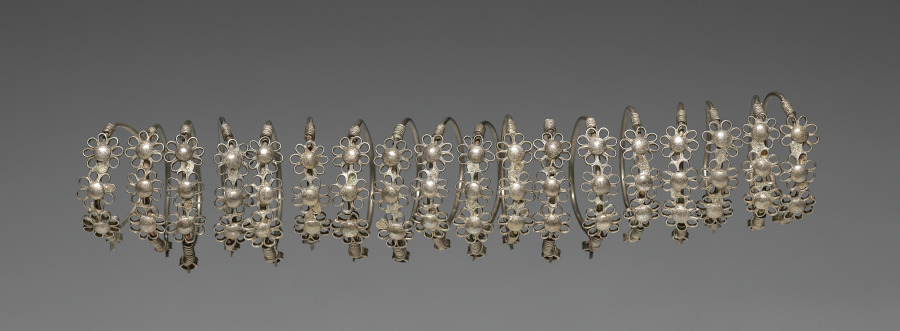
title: Eighteen Earrings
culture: India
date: 1800s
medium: silver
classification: Jewelry